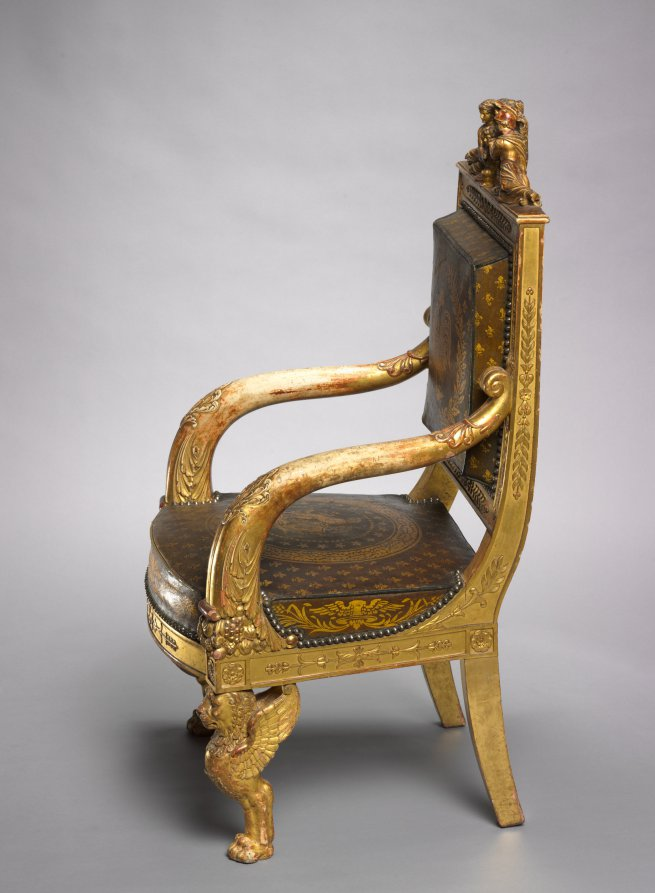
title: Child's Throne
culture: France, Paris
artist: Pierre-Marie Balny le Jeune (French, 1832)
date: 1822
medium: carved and gilded wood, leather upholstery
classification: Furniture and woodwork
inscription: inscribed with stencils inside back rail: BLONDEL TAPISSIER/RUE ST. ANTOINE N 72 1822 inscribed in ink lower edge back rail: 12 JANVIER 18[22?]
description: This chair was made for the young, presumed successor to the French throne who ruled briefly as Henri V in 1830, the last of the direct Bourbon line. He is depicted at the center of the top rail protected by female figures representing France and Minerva, the Roman goddess of wisdom. Fleurs-de-lis and the Gallic rooster, symbols of French royalty and the French people, decorate the upholstery.